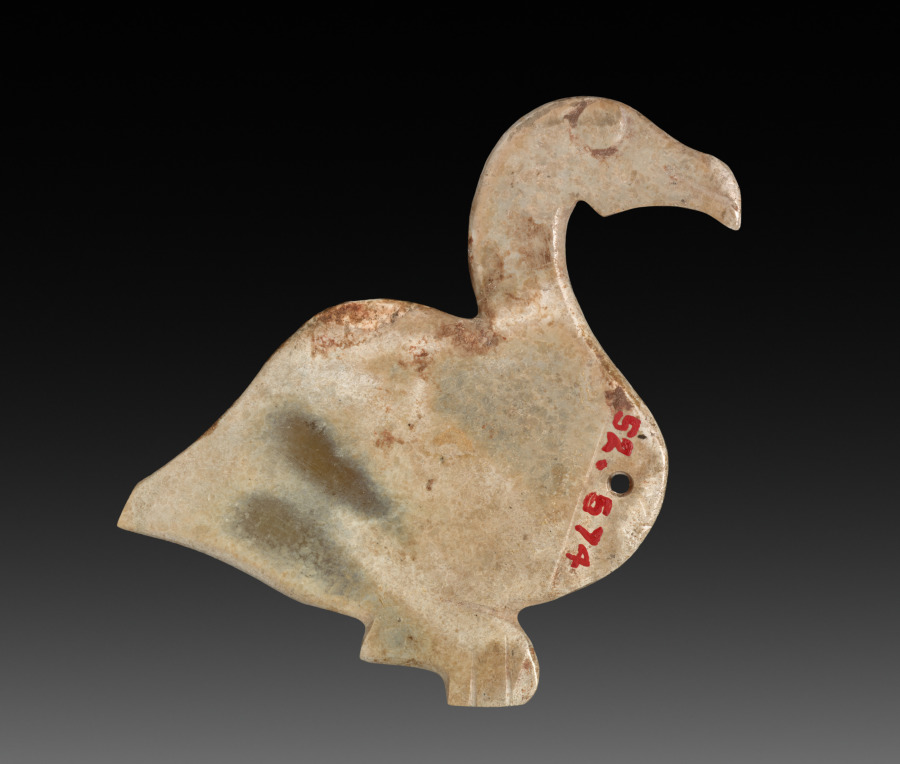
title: Goose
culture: China, Western Zhou dynasty (c. 1046–771 BCE)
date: 1100–900 BCE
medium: jade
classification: Jade